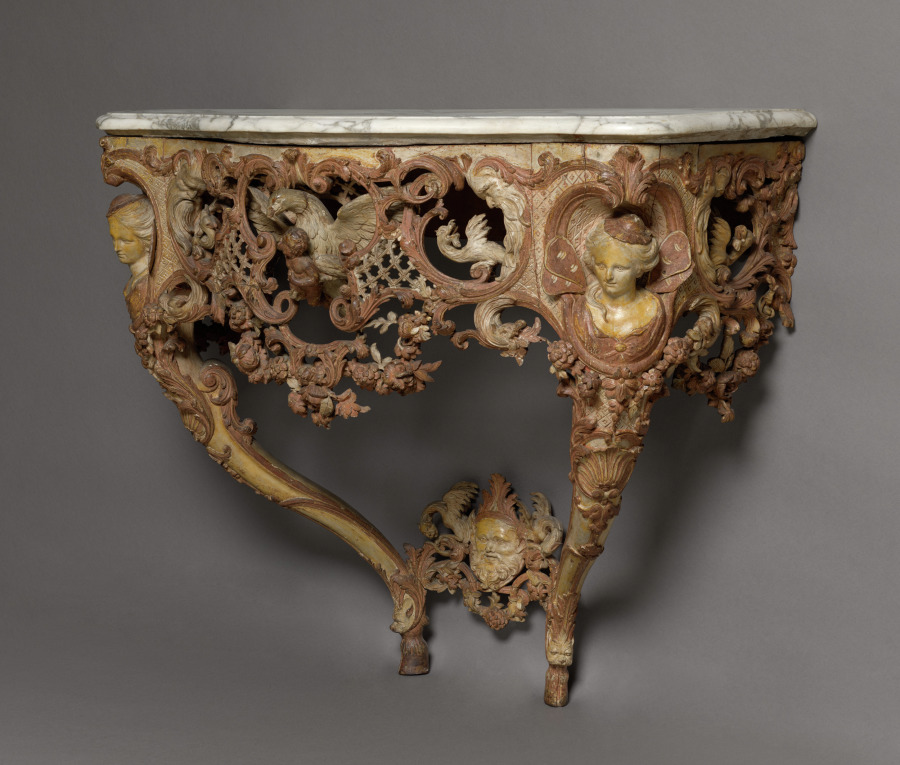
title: Console Table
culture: France, 18th century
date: c. 1720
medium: carved and painted wood, marble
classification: Furniture and woodwork